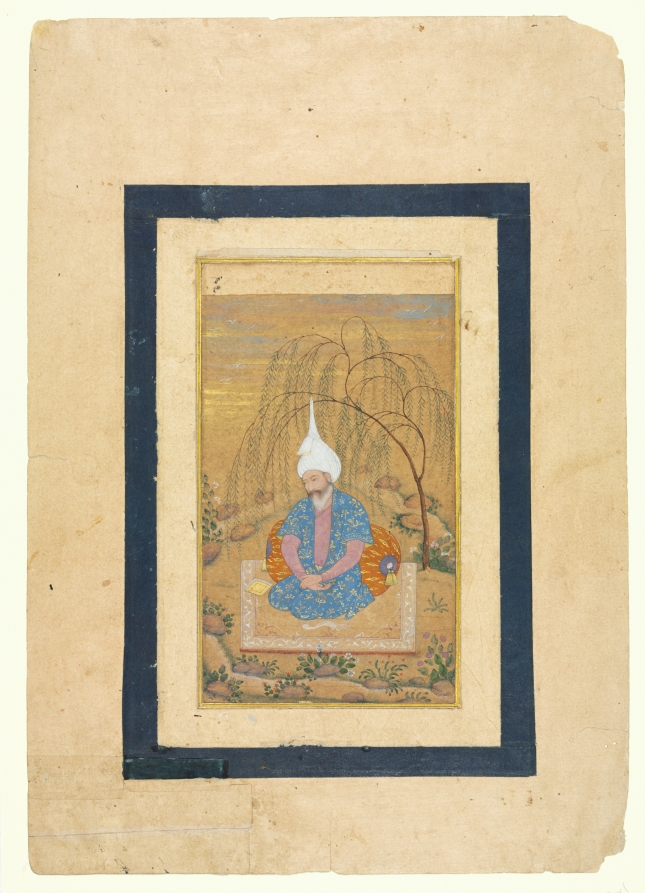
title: Shah Tahmasp I (1514–1576) Seated in a Landscape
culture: Iran, Qazvin, Safavid period (1501-1722)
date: c. 1575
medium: opaque watercolor and gold on paper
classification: Manuscript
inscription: Inscription in English, undated: "Portrait of Tahmasp I, Shāh Safavi, King of Persia (b. 1514: d. 1576). Reigned, 1524–1576. The celebrated ally and friend of the Mogul Emperor Humayun. Persian; about 1575."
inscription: [square black seal]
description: Shah Tahmasp I, the second ruler of Iran’s Safavid dynasty, is shown kneeling pensively on a carpet under a willow on the banks of a stream, a book at his side. The luxurious fabrics of his robe and his bolster pillow, with sprigs and cloud motifs in gold, indicate his wealth and privilege. Even the fine white cloth of his turban is edged in gold, topped by a small cluster of jewels.